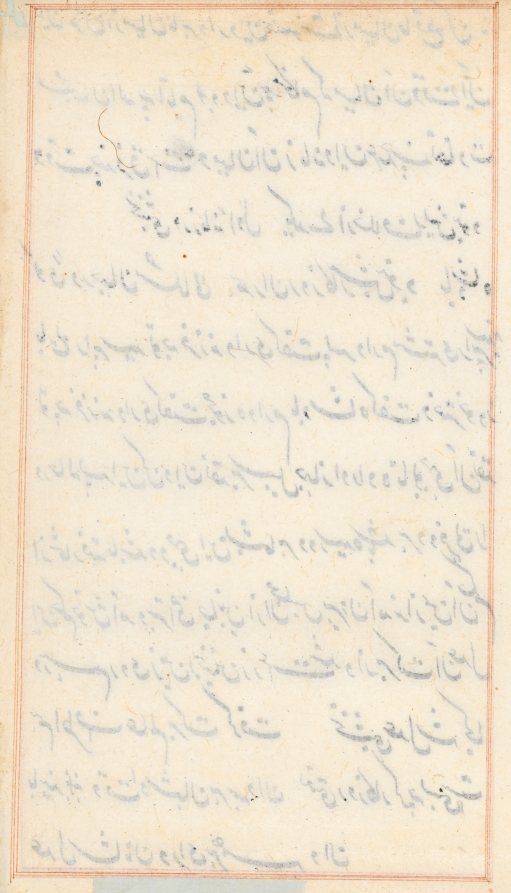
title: Page from Tales of a Parrot (Tuti-nama): text page (blank)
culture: Mughal India, court of Akbar (reigned 1556–1605)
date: c. 1560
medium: gum tempera, ink, and gold on paper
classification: Painting